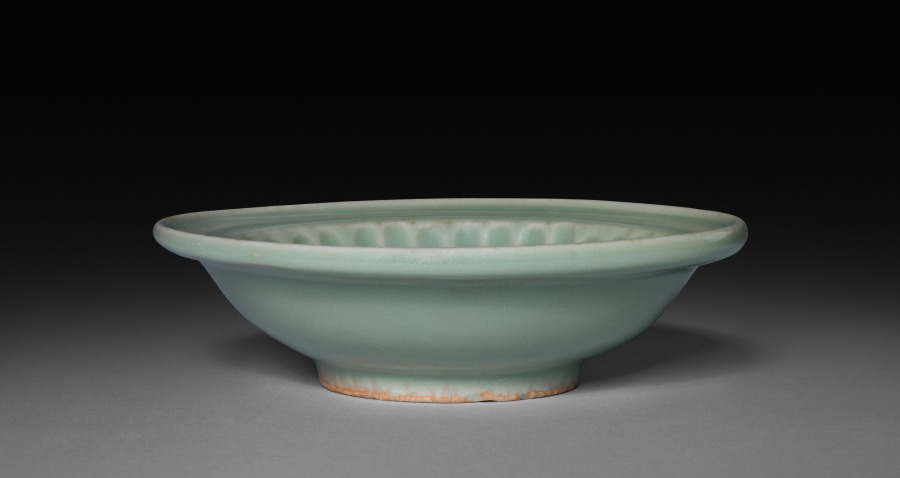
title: Plate: Longquan Ware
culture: China, Southern Song Dynasty (1127-1279) - Yuan Dynasty (1271-1368)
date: 1200s-1300s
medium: glazed porcelain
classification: Ceramic